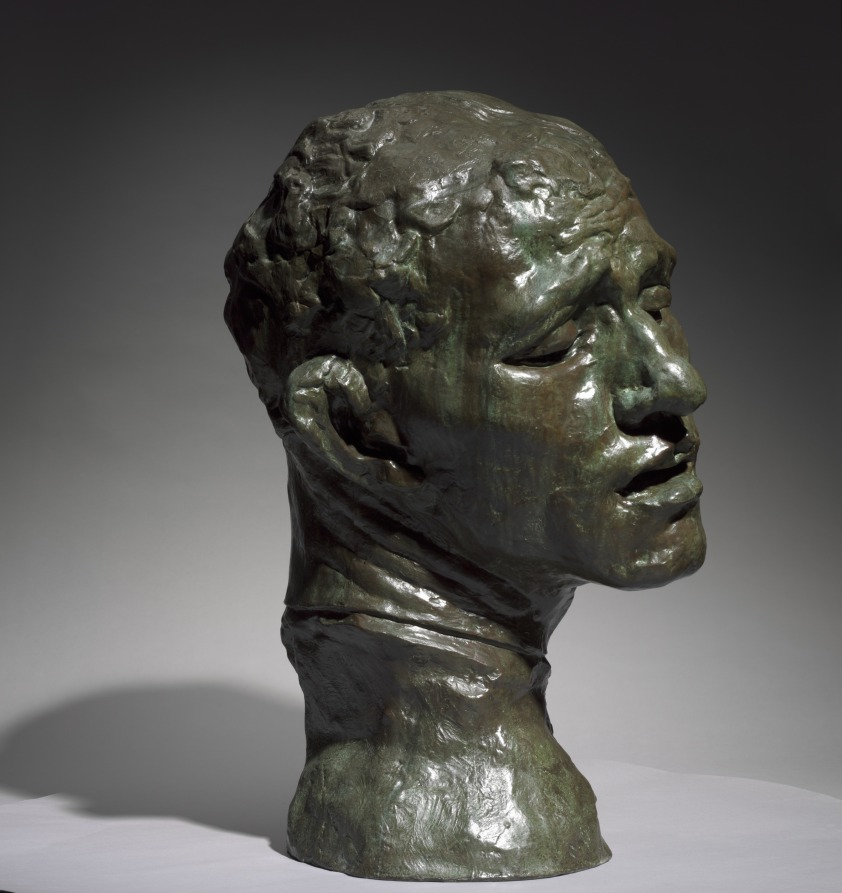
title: Heroic Head of Pierre de Wissant, One of the Burghers of Calais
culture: France, 19th century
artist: Auguste Rodin (French, 1840–1917)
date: 1886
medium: bronze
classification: Sculpture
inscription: inscribed at neck, left: A.Rodin; inscribed lower back: Alexis Rudier/Fondeur-Paris.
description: This sculpture depicts one of the figures in Rodin’s large public monument The Burghers of Calais (1884–89), featuring six French men who volunteered to be taken prisoner by the English in exchange for lifting the siege of Calais during the Hundred Years War (1337–1453). Pierre de Wissant’s anguished expression suggests extreme mental suffering as he contemplates his expected execution. Rodin exhibited a life-size version of the figure as an independent work before completing the monument. He later made multiple versions in various sizes and media.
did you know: This sculpture depicts the head of a figure from Rodin's large public monument The Burghers of Calais (1884-89). The CMA also owns a plaster version of the head.